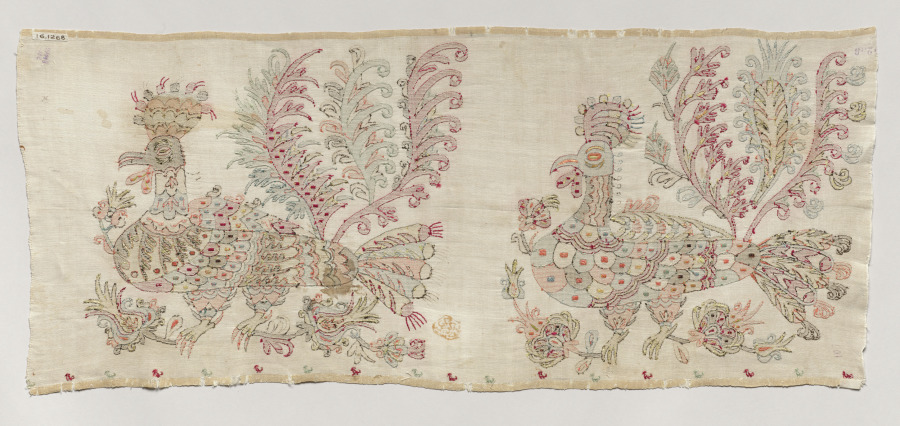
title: Panel, Probably from a Skirt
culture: Greece, Sporades Islands, Skyros, 19th century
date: 1800s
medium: embroidery: silk on linen tabby ground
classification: Embroidery